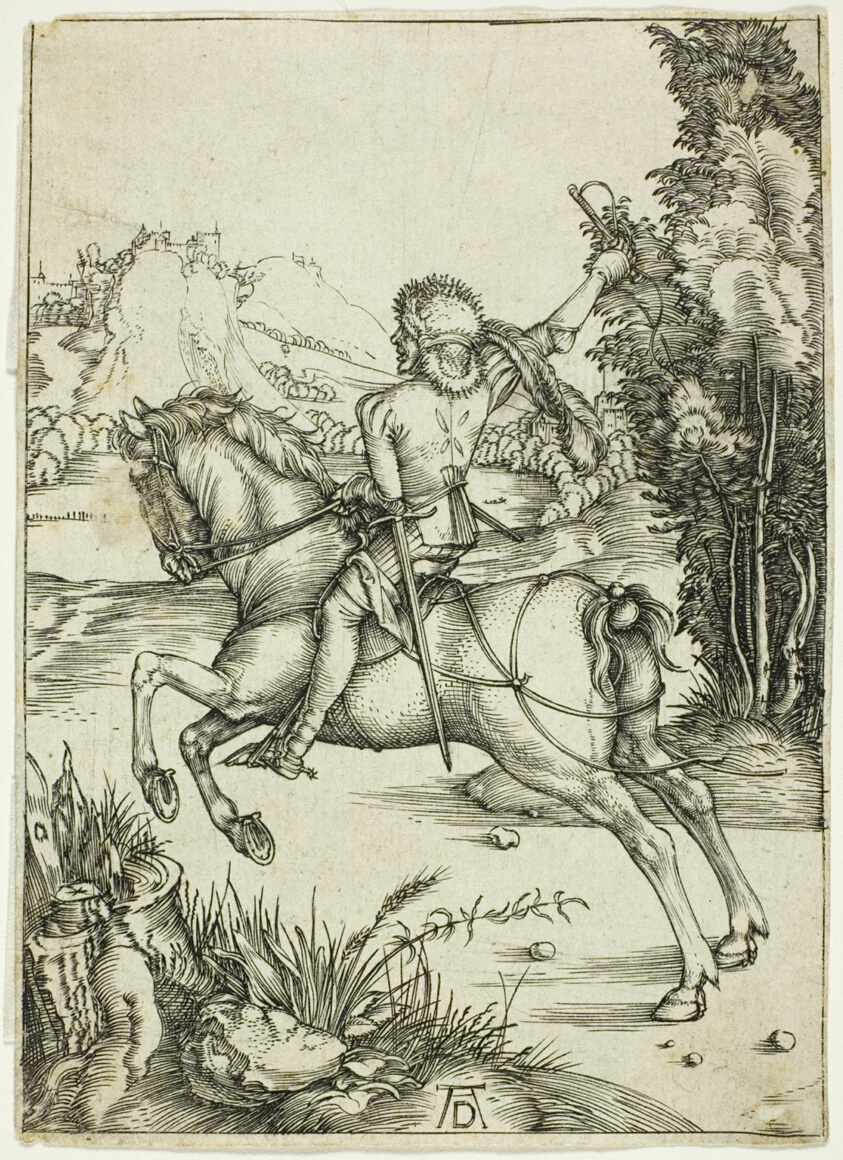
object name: Print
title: The Small Courier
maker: Albrecht Dürer (German, 1471-1528)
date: c. 1496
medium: Engraving in black on ivory laid paper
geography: Germany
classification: engraving; print; prints and drawing; paper